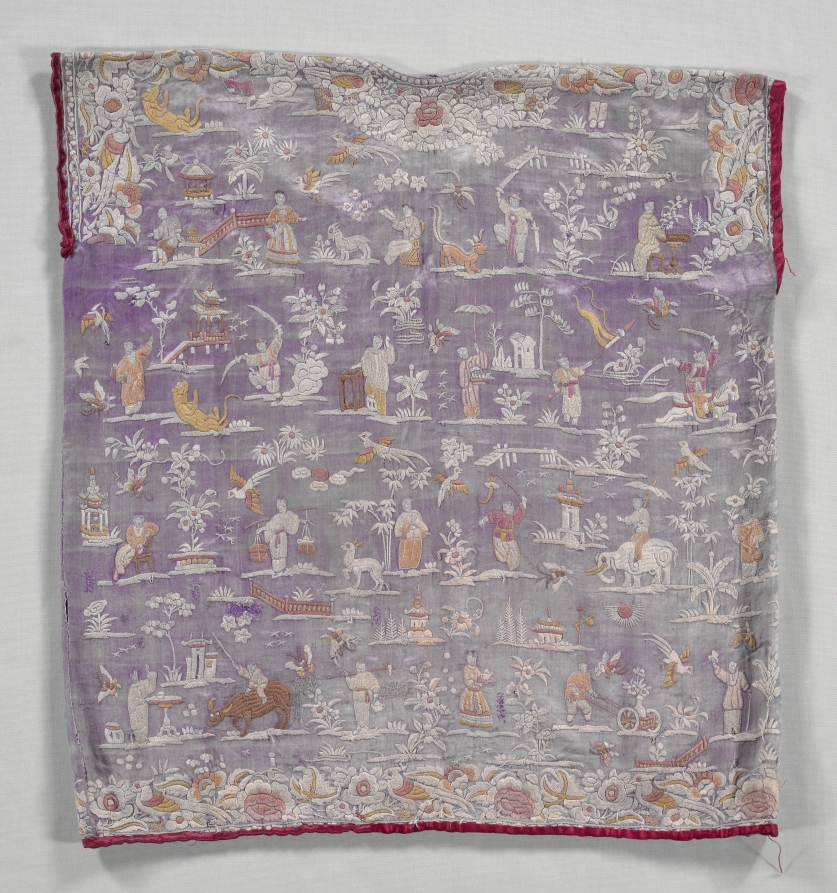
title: Blouse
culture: China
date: late 1800s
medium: embroidery, silk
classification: Garment